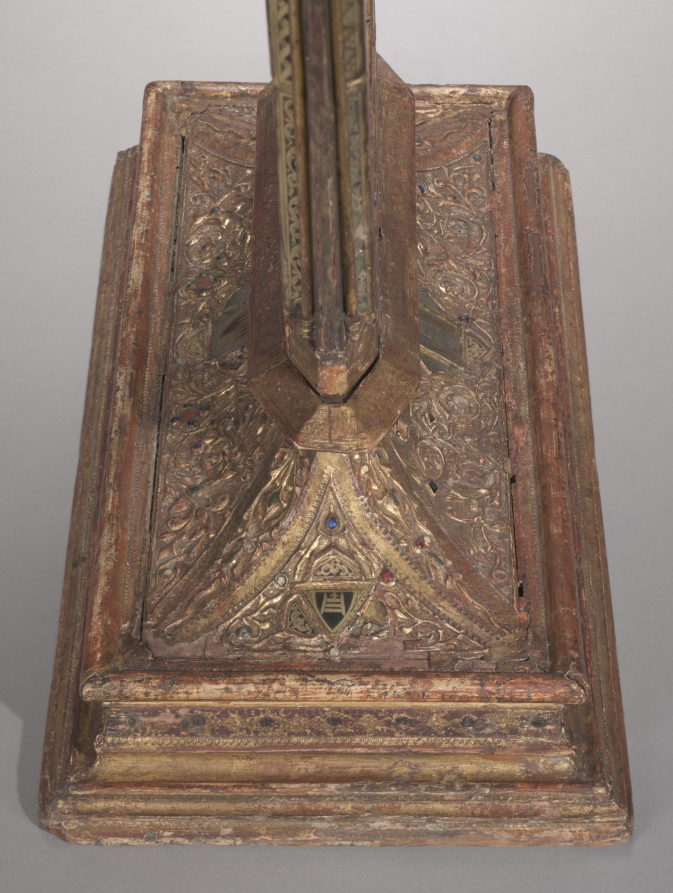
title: Frame for a Portable Reliquary Icon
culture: Italy, Siena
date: 1347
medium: gilded wood, modeled gesso, verre églomisé, glass cabochons, and relics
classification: Glass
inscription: an inscription with a stipled background runs around the lowest edge of the upright part of the frame: obverse: HOC/OPUS : FACTUM . FUIT . SUB . ANNO . DO/MINI; reverse: [small loss] /CCC . XLVII . TEMPORE . DOMINI . MINI/CINI. [This/work : has . been . made . under . year . of . the . Lord [small loss] /300 47 . in . the . time . of the Lord . Mini/Cini.] Another inscription appears on the obverse and reverse of the base: LUCAS ME FECIT. [Luke has made me.]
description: In the Middle Ages relics were thought to possess extraordinary power and were enshrined in lavish vessels called reliquaries. This complex frame once contained a painted image on each side, believed to be the Madonna and the Crucifixion, both long since lost. These images were surrounded by 17 carefully labeled relics, still visible. Intentionally portable, such votive objects could be easily carried from room to room or building to building as needed. A Latin inscription around the base reads: This work has been made under the year of the Lord CCCXLVII [1347] in the time of the Lord Mini/Cini. The inscription likely refers to Mino Cinughi, rector of the Hospital of Santa Maria della Scala in Siena, 1340-51. The Cinughi coat of arms as well as those of the hospital appear on the base. Another inscription, LUCAS ME FECIT (Luke made me), appears on both sides of the base. While this object probably resided on an altar in the hospital, the fact that it has two sides suggests it was carried aloft in processions.